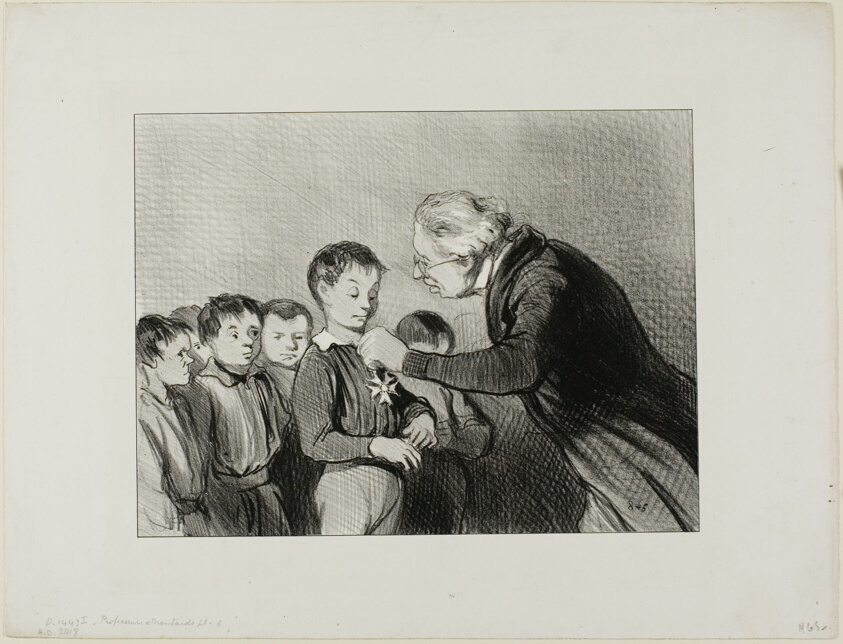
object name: Print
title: “- Mr. Alfred Cabassol! You are the only one in the class who succeeded to get through the entire week without blowing your nose into your sleeve. Please stand to receive this prize of honour for cleanliness,” plate 6 from Professeurs Et Moutards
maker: Honoré Victorin Daumier; French, 1808-1879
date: 1846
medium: Lithograph in black on white wove paper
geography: France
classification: lithograph; print; prints and drawing